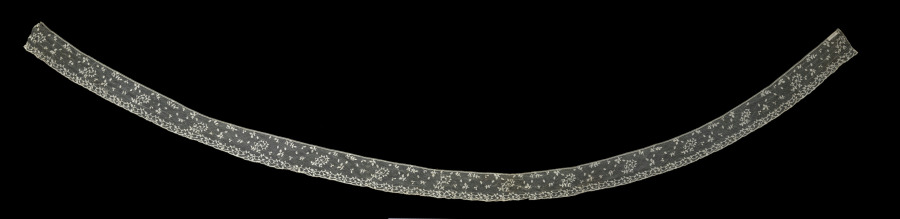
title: Lace Edging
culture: Belgium; Brussels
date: 1780–99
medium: Bobbin lace (appliqué)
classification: Lace